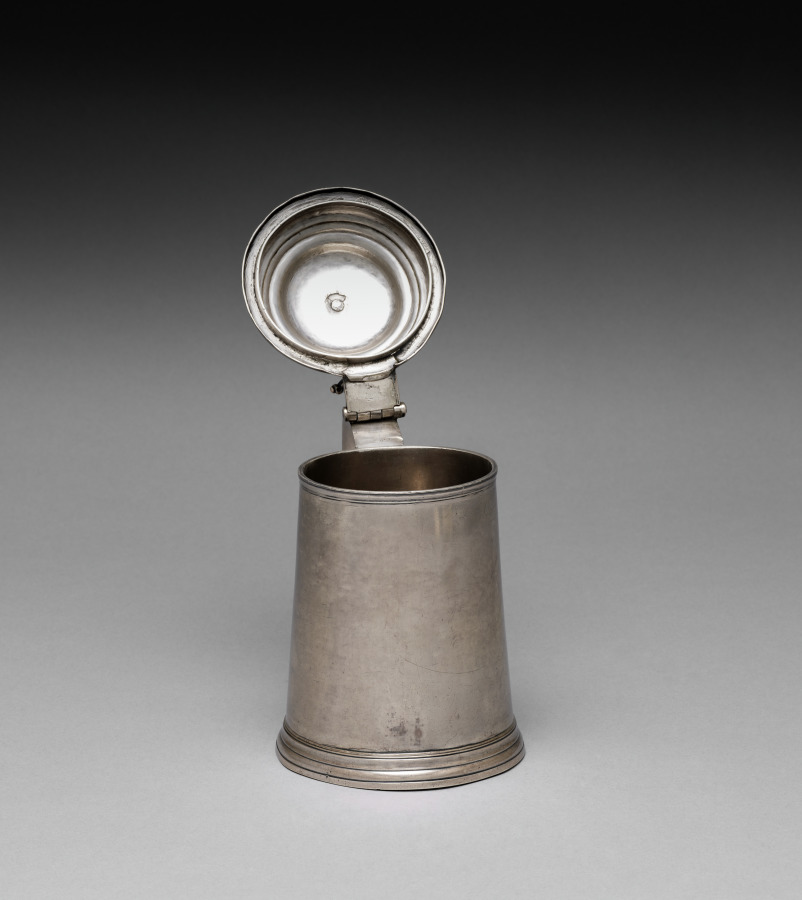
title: Tankard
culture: America, Massachusetts or Rhode Island, 18th century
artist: Jonathan Clarke (American, 1706–1766)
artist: or Joseph Clark (American)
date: c. 1750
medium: silver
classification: Silver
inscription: Engraved on handle: "B" over "I*E".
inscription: Stamped on handle: "Georgius II Deui Gratia".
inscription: Stamped underside: "I. Clark".